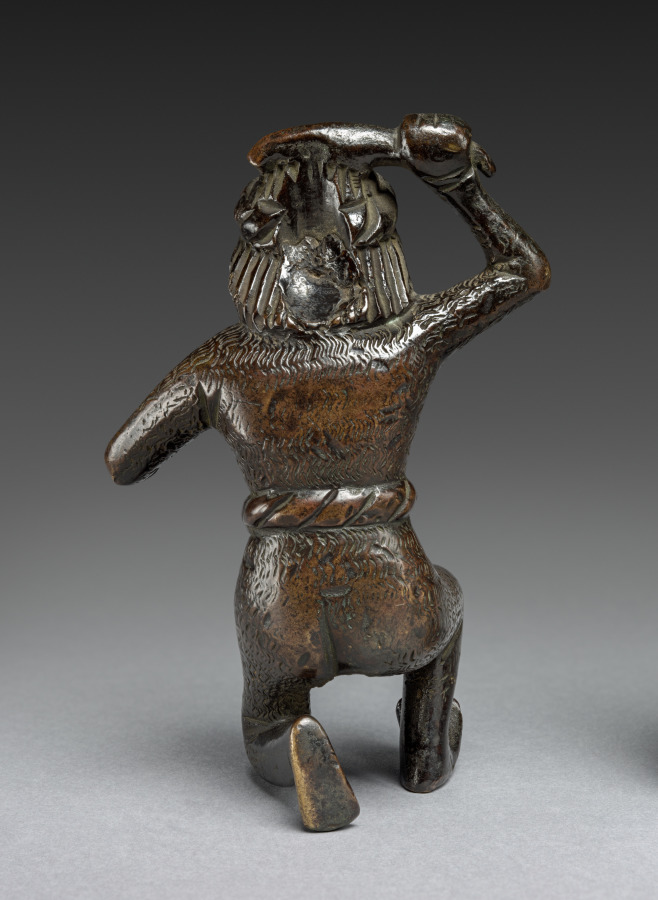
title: Wild Man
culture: Germany, Nuremberg(?)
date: late 1400s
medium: copper alloy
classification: Sculpture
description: Common in medieval art, the wild man is humanlike in appearance with long shaggy hair over his entire body and typically carries a club. Living at the fringe of society in woodland areas, wild men symbolized man in his natural, uncivilized state. Perhaps derived from the part-man part-beast satyr of antiquity, the wild man symbolized lust and aggression in contrast to the spiritual love embodied in medieval chivalry. This bearded version is shown kneeling while raising his right arm holding a club. He wears a twisted cloth circlet on his head and a similar belt at the waist. It has been suggested that this sculpture originally formed part of a suspended candelabra. It may also have served as support for large metal vessels.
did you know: The wild man is derived from the Greek satyr who lived in the woods.